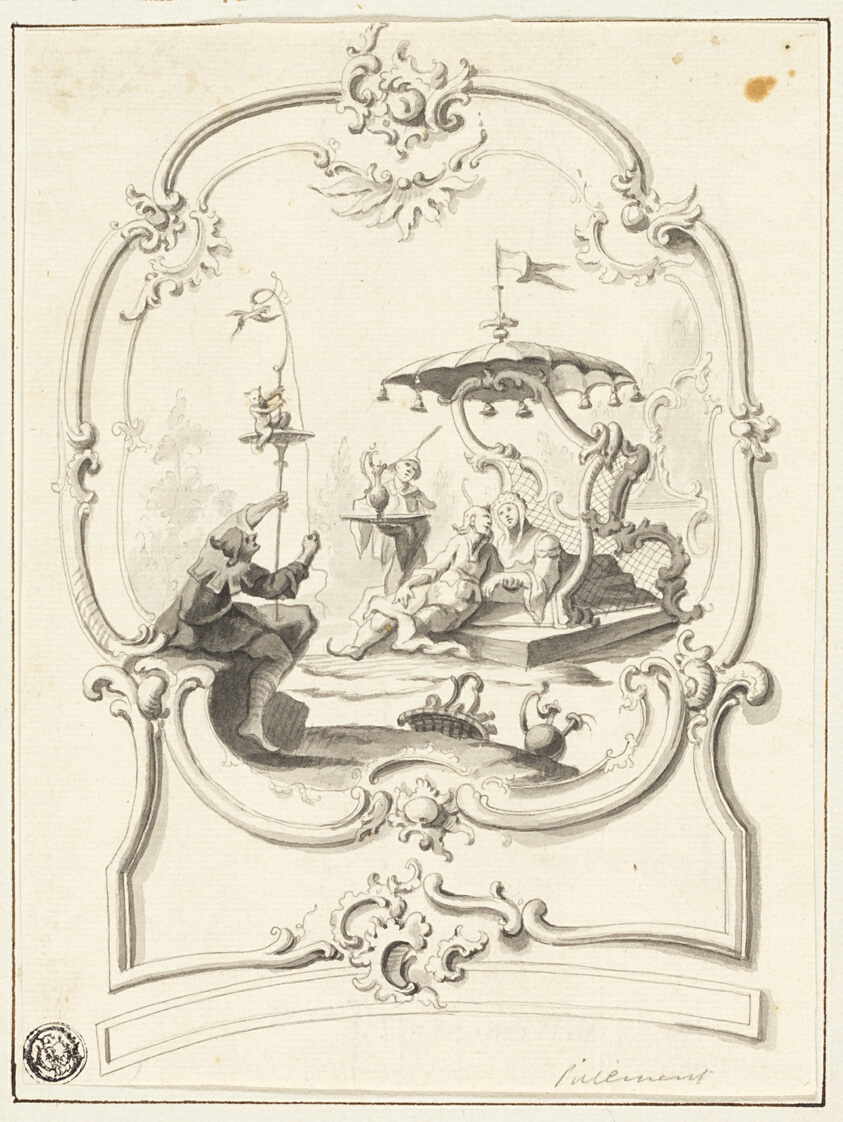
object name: Drawing and Watercolor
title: Chinoiserie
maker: Jean Baptiste Pillement (French, 1728-1808)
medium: Pen and black ink and brush and black wash, with traces of graphite, on ivory laid paper, tipped onto ivory laid paper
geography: France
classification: pen and ink drawings; paper; brush and wash; drawings (visual works); prints and drawing